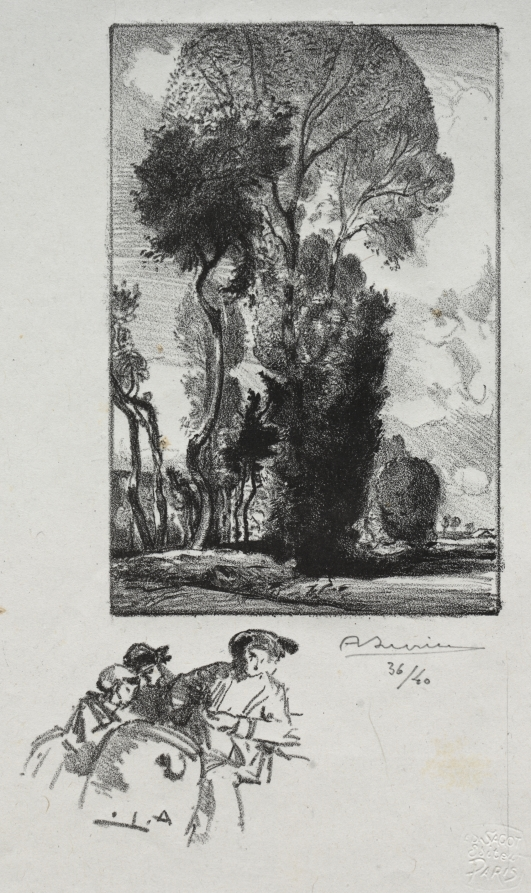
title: Le Bocage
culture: France, late 19th-early 20th Century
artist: Auguste Louis Lepère (French, 1849–1918)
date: 1909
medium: lithograph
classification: Print